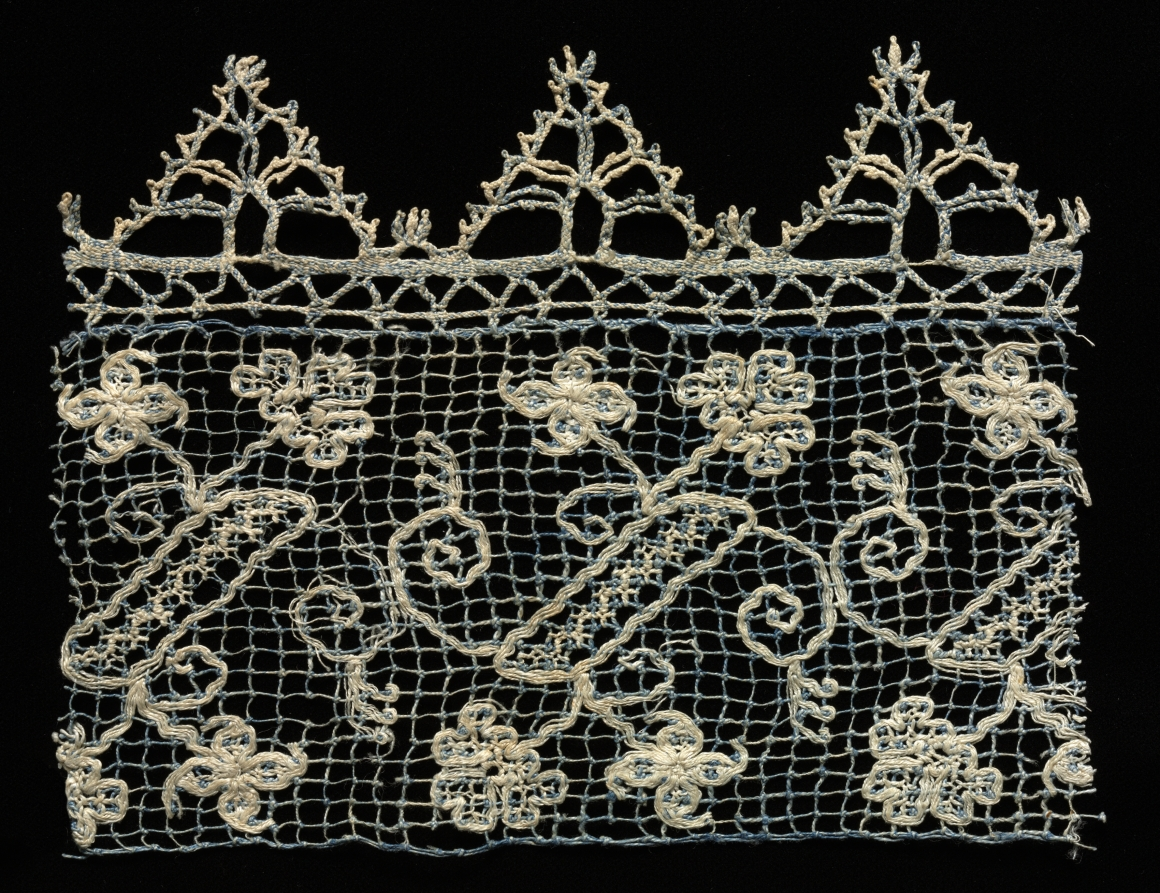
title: Fragment of a Border with Vines and Floral Motifs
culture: Italy, 1600s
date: 1600s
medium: Bleached and blue dyed linen (est.): needle lace, filet/lacis (knotted ground and darned in one direction) and bobbin lace edging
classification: Lace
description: The light blue ground of this fragment of lace, together with the varying thicknesses of threads used for the ground and the embroidered pattern, create a sense of depth in the textile. The white thread is bleached linen and the blue is linen that has been bleached and dyed.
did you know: The word lace derives from the Latin laqueus, meaning noose.